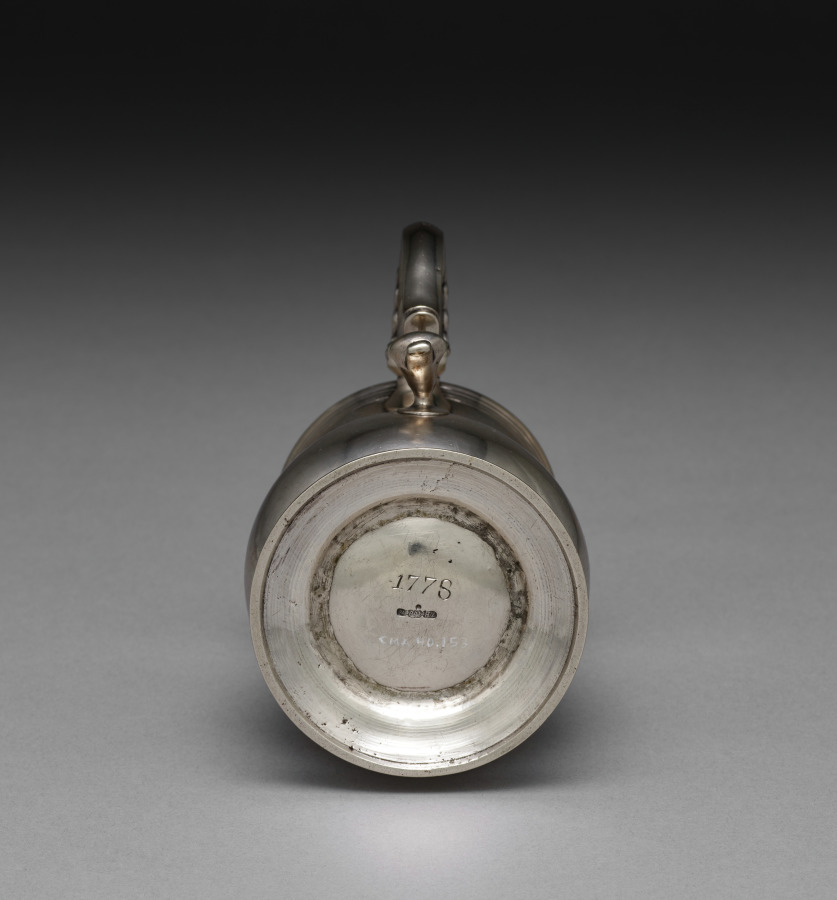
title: Cann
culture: America, Massachusetts, Boston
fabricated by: Zachariah Brigden (American, 1734–1787)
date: c. 1778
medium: silver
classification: Silver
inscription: Engraved on cann opposite handle: "BFG"; engraved underside: "1778"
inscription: Stamped underside: "Z. Brigden"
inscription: Scratched underside: "13-0,9"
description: "Cann" is an old term for a drinking cup with a handle.